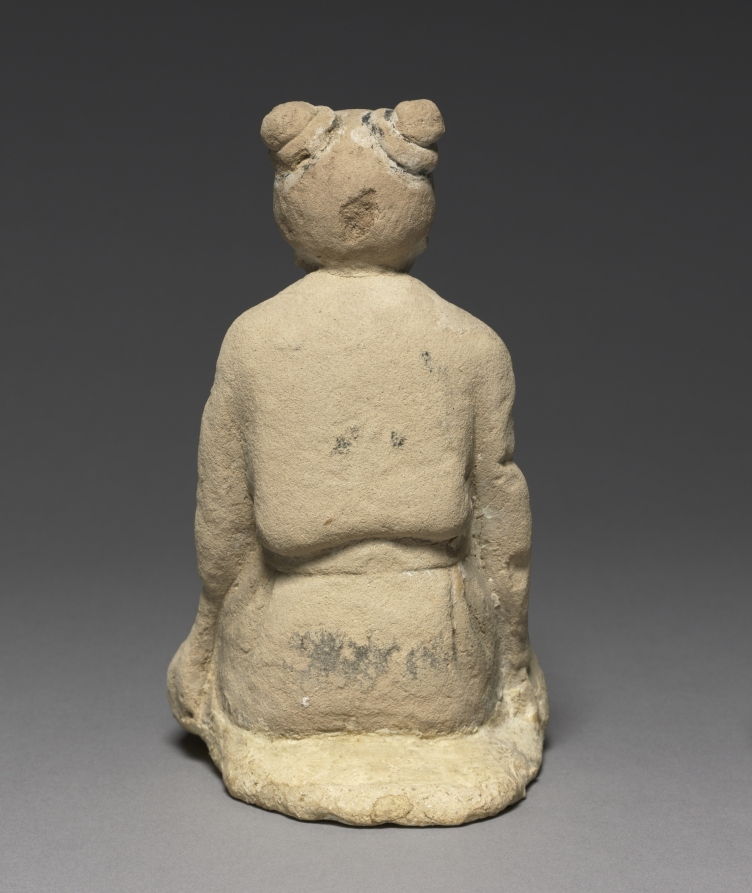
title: Woman from an Audience Scene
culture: Japan, Asuka period (538-710) to Nara period (710-94)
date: mid-600s to early 700s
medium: unfired clay with color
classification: Sculpture